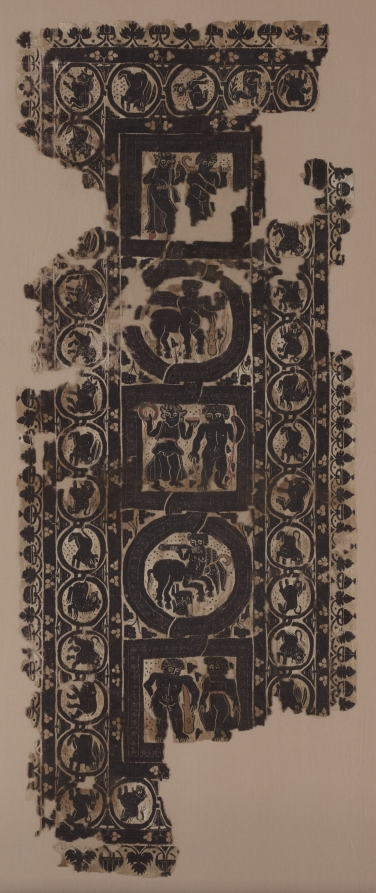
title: Curtain Panel with Scenes of Merrymaking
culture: Egypt, Byzantine period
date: 500s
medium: Linen, undyed; wool: dyed; tapestry weave with supplementary weft wrapping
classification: Textile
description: This large panel conveys merrymaking, wealth, and power through its symbolic imagery and deep purple color. It was originally part of a luxurious wide curtain with similar panels alternating with plain linen panels. Although woven in Christian Egypt, the panel is dominated by pagan subjects. A nude male stands beside a dancing female in transparent clothing in each of the three squares, alternating with centaurs (half-man, half-horse creatures) in roundels. In the central square, Dionysus, the god of wine, holds a grapevine and a weary Hercules leans on his club below. The lively animal imagery conveys wealth because few could afford animals such as lions, bulls, and hares.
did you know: The textile industry drove the Egyptian economy, dominated by the flax plant from which linen is derived.